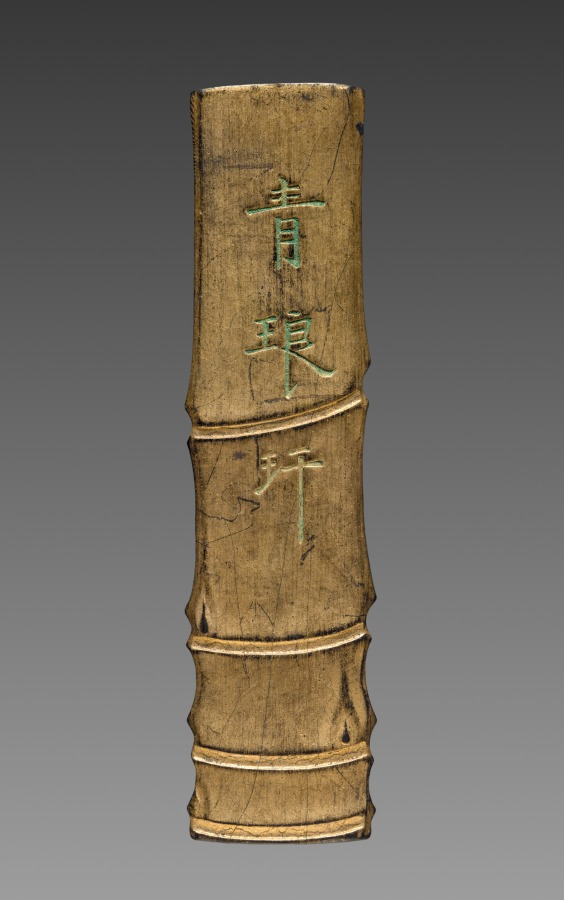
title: Ink Cake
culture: China, Qing dynasty (1644-1911)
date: 19th Century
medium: ink cake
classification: Miscellaneous